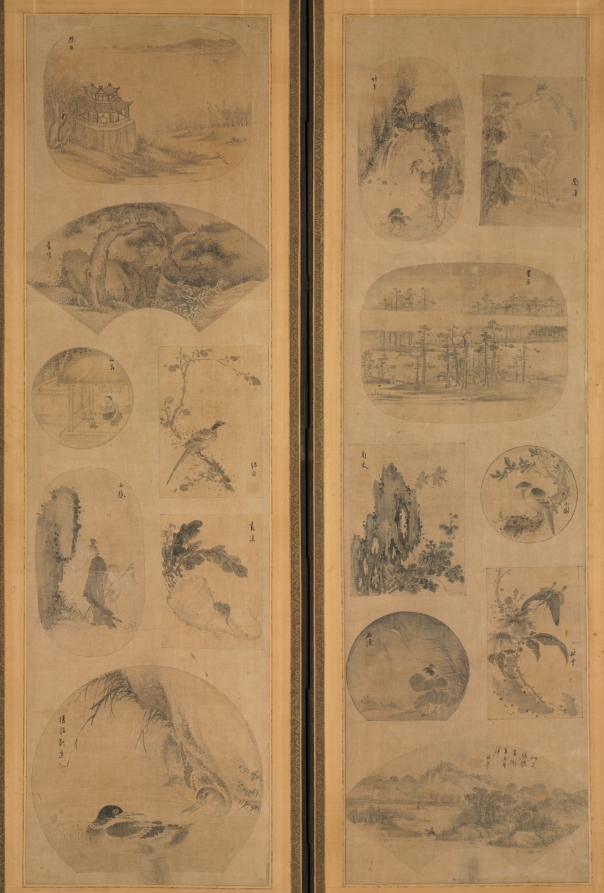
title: Painting of One Hundred Themes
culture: Korea, Joseon dynasty (1392–1910)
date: late 1800s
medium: Ten-panel folding screen affixed with album leaves (obverse), calligraphy (reverse), ink and color on silk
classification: Painting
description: The front of this screen features an assortment of subjects: birds and flowers, landscapes, and scenes of everyday life, mostly in monochromatic ink with light colors. The screen’s reverse side conveys a number of classical poems about the fleeting beauty of the four seasons. Traditionally, only one side of a folding screen bears painted or embroidered images, since these were used as a background furnishing. In Korean houses by the 1800s and early 1900s, however, two-sided folding screens became noticeably popular, possibly inspired by Japanese double-sided folding screens, which mainly served as room dividers in Japanese households.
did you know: The way of displaying small images of various subjects became one of the most popular type of painting toward the end of the 19th century.